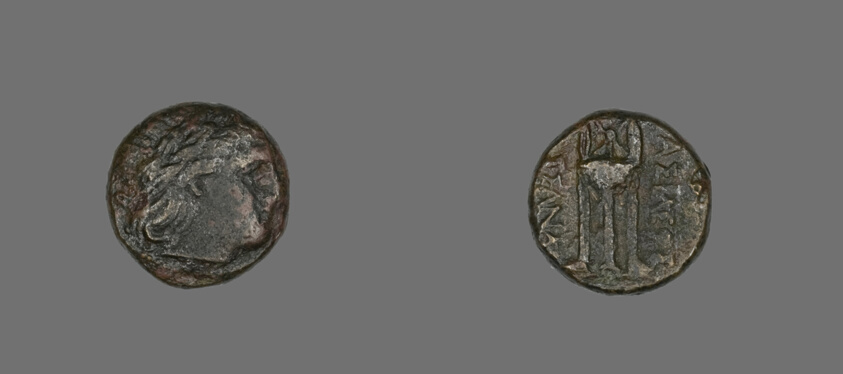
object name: Coin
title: Coin Depicting the God Apollo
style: greek, ancient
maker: Greek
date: 316-297 BCE, issued by Cassander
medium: Bronze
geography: Greece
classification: coin; ancient art; struck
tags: gods (deities)